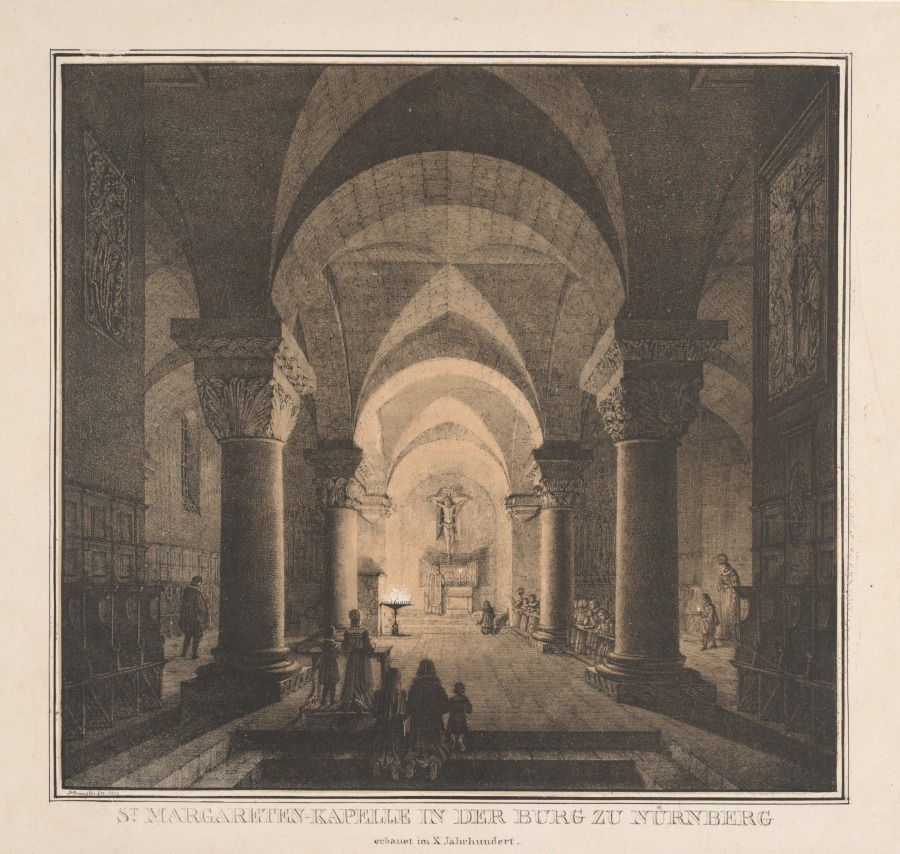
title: Notable Buildings of the Middle Ages in Germany: St. Margaret's Chapel in the Imperial Castle at Nuremberg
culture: Germany, 19th century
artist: Domenico Quaglio (German, 1787–1837)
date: 1819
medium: lithograph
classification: Print